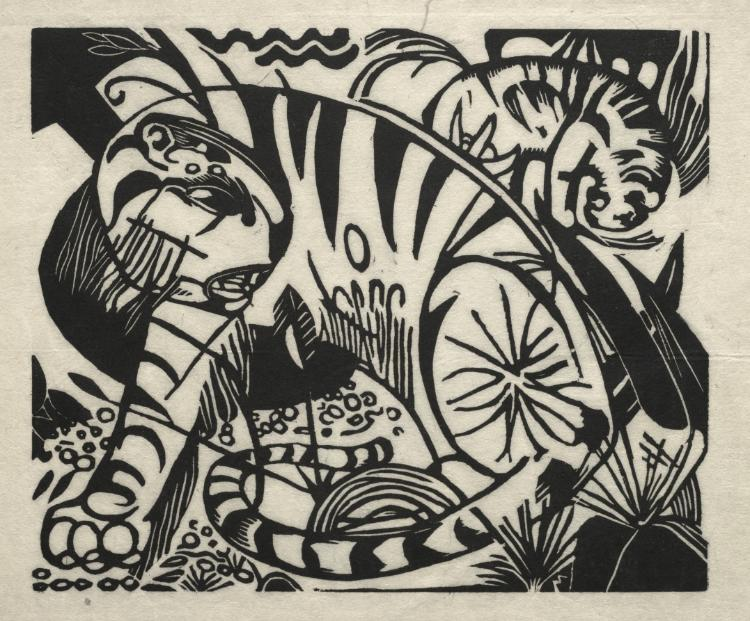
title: Tiger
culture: Germany, 20th century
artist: Franz Marc (German, 1880–1916)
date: 1912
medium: woodcut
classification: Print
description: Like other members of Der Blaue Reiter in Munich, Franz Marc focused on depicting animals, which symbolized joyous rebirth. Genesis II was made to illustrate the creation story in the book of Genesis; he planned to include it in an illustrated Bible. Here, three horses emerge from a background of chaos and movement. His Tiger is less joyous and more threatening than the bounding horses; with clenched teeth, the tiger leers toward a cowering animal behind it. After enthusiastically enlisting in the German army, Marc died in battle at Verdun, France, on March 4, 1916. His wartime death—and that of fellow artist August Macke—had a profound impact on the Munich Expressionists, whose vision of an earthly paradise quickly dissolved.